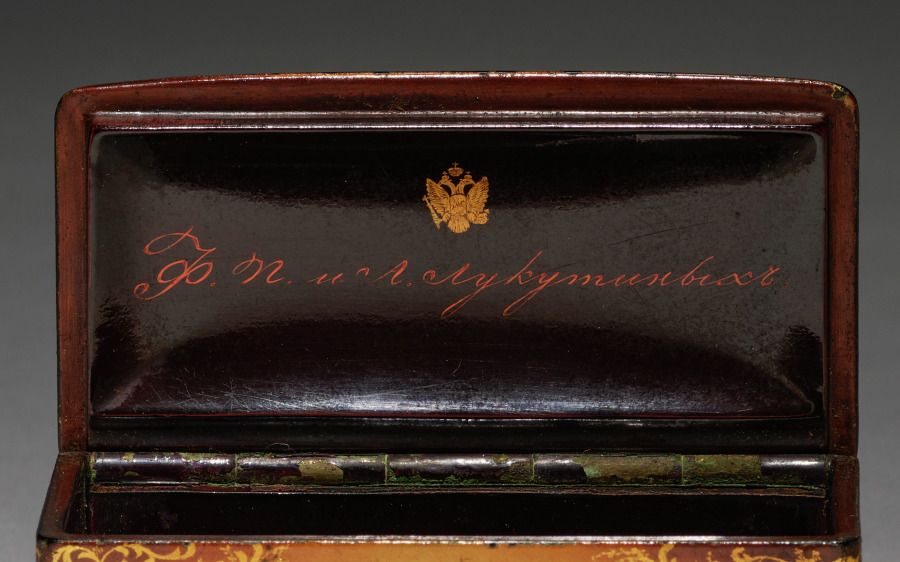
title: Box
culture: Russia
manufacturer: Lukutin Factory (Russian, 1818–1904)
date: 1830–81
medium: lacquered wood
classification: Miscellaneous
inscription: inscription on interior.